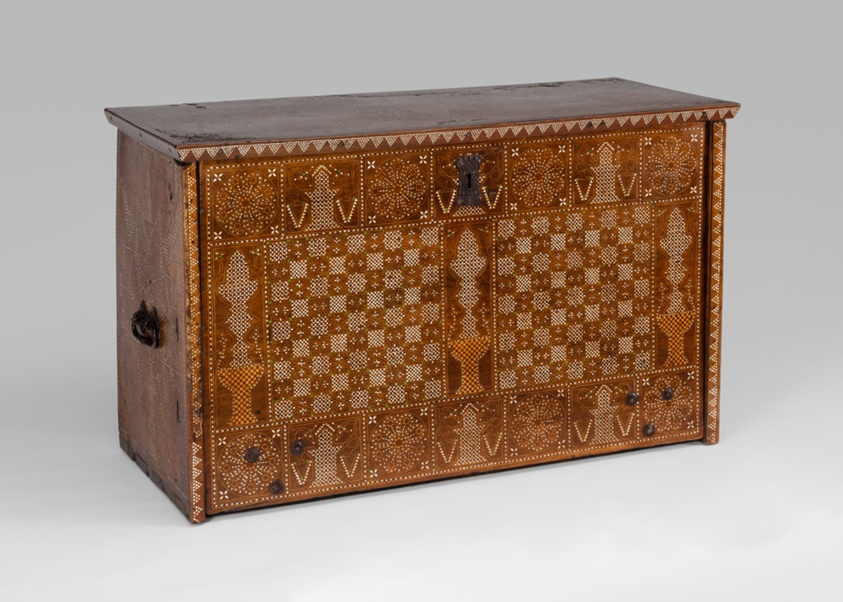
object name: Furniture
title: Writing Cabinet (Escritorio)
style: Islamic, hispano-moresque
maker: Spanish, possibly Granada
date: 1500/50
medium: Walnut, boxwood, bone, iron, copper alloy, and gilding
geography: Granada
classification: furniture; islamic; decorative arts; furnishings; furnishings (transportable); inlay; writing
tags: geometric